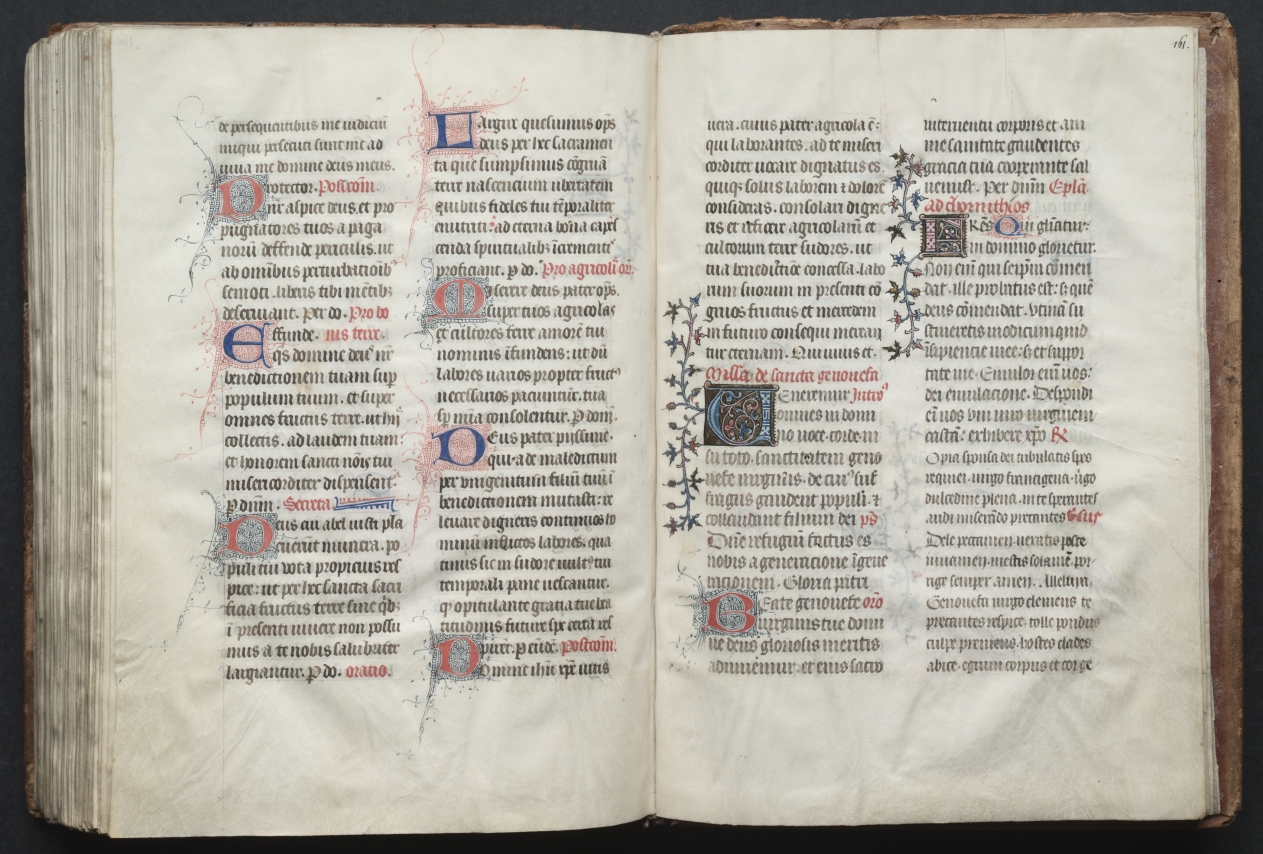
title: The Gotha Missal: Fol. 160v, Text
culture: France, Paris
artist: Master of the Boqueteaux (French)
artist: and Workshop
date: c. 1375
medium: ink, tempera, and gold on vellum; blind-tooled leather binding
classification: Bound Volume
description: The style and quality of this manuscript's decoration is typical of deluxe Parisian books made for aristocratic or royal patrons. Most of the book's decoration appears to be the work of the Master of the Boqueteaux, an artist active at the court of King Charles V (died 1380). His style was apparently shared by a number of book illuminators working in and around Paris. It is very possible that the Gotha Missal belonged to Charles V, but is not provable because the manuscript has no royal portraits and lacks a colophon. Given the book's magnificent decoration, however, it would seem that it was produced for a Valois prince, if not for the king himself. The manuscript receives its name from the German dukes of Gotha, its later owners.